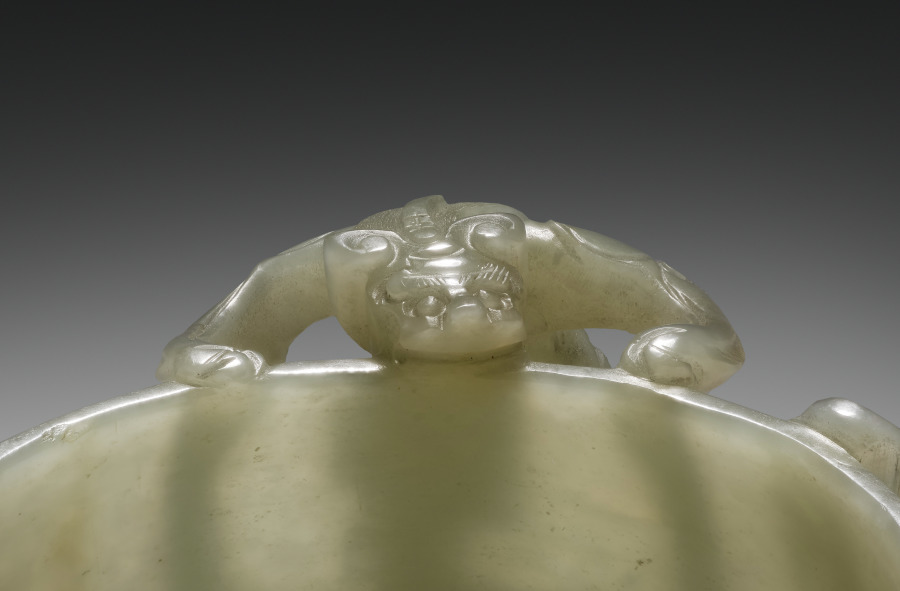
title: Cup with Dragon Handles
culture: China, Qing dynasty (1644-1911), Kangxi reign (1662-1722)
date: 1662–1722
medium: Pale gray-green white jade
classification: Jade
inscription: 萬壽長春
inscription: 壽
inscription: 子剛造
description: Three dragons, auspicious symbols for good fortune, grasp the rim of this bowl. A large shou (longevity) character is visible on the outside wall. Drinking cups with dragon handles were elite luxuries. The yellowish-white color and refined techniques are characteristic of Suzhou workshops that served the court, scholar-officials, and the merchant class. The optimistic attribution to Lu Zigang (late 1500s), a jade master recorded to have been active in Suzhou, suggests that its maker used the master’s name to attract wealthy clients eager to demonstrate their refined taste and connoisseurship.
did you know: Auspicious inscriptions on the base and front of the jade cup convey wishes for longevity.